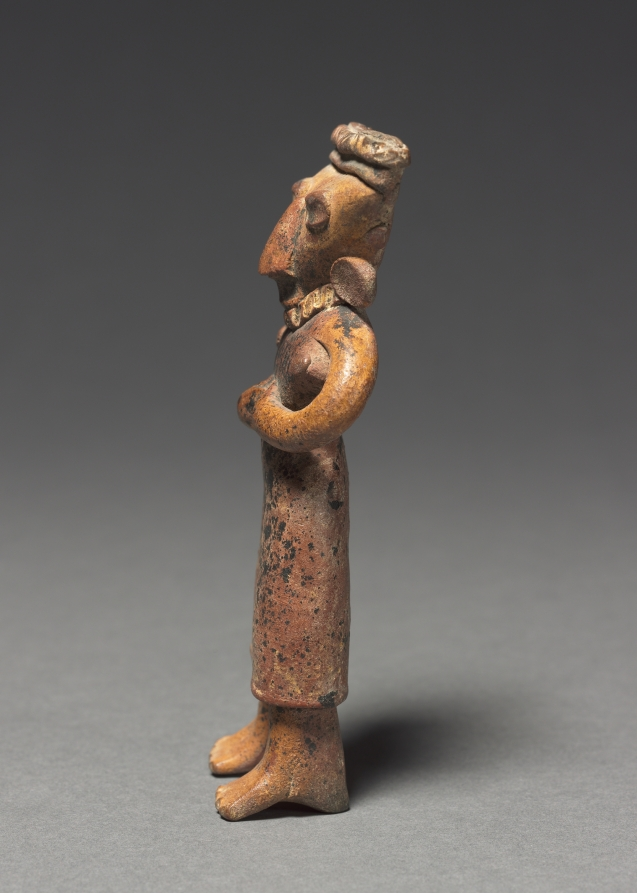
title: Female Figurine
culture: Mexico, Michoacán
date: 100 BCE–300 CE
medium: earthenware with pigment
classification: Sculpture